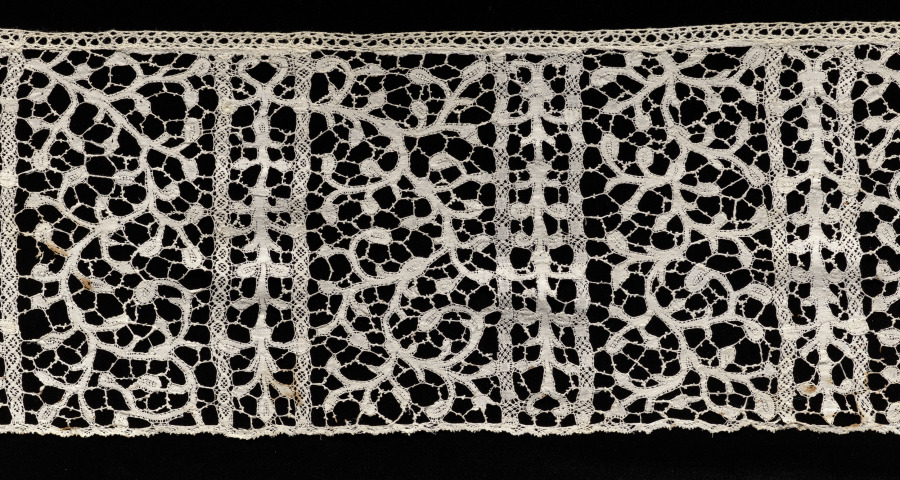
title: Lace Flounce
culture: Italy, Milan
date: 1500s–1600s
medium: Bobbin lace (Punto di Milano)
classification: Lace